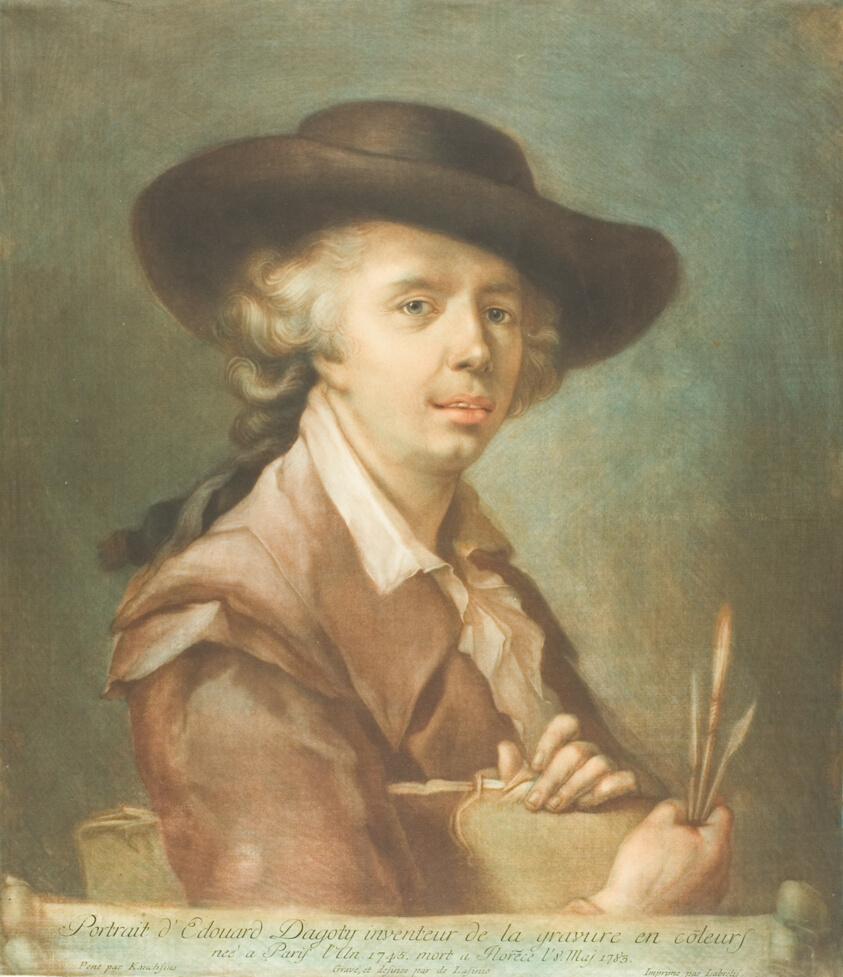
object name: Print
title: Portrait of Edouard Dagoty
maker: Carlo Lasinio (Italian, 1759-1838); After Johann Ernst Heinsius (German, 1740-1812)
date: After 1783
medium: Color mezzotint, with traces of scraping on ivory laid paper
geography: Italy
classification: mezzotint; print; prints and drawing